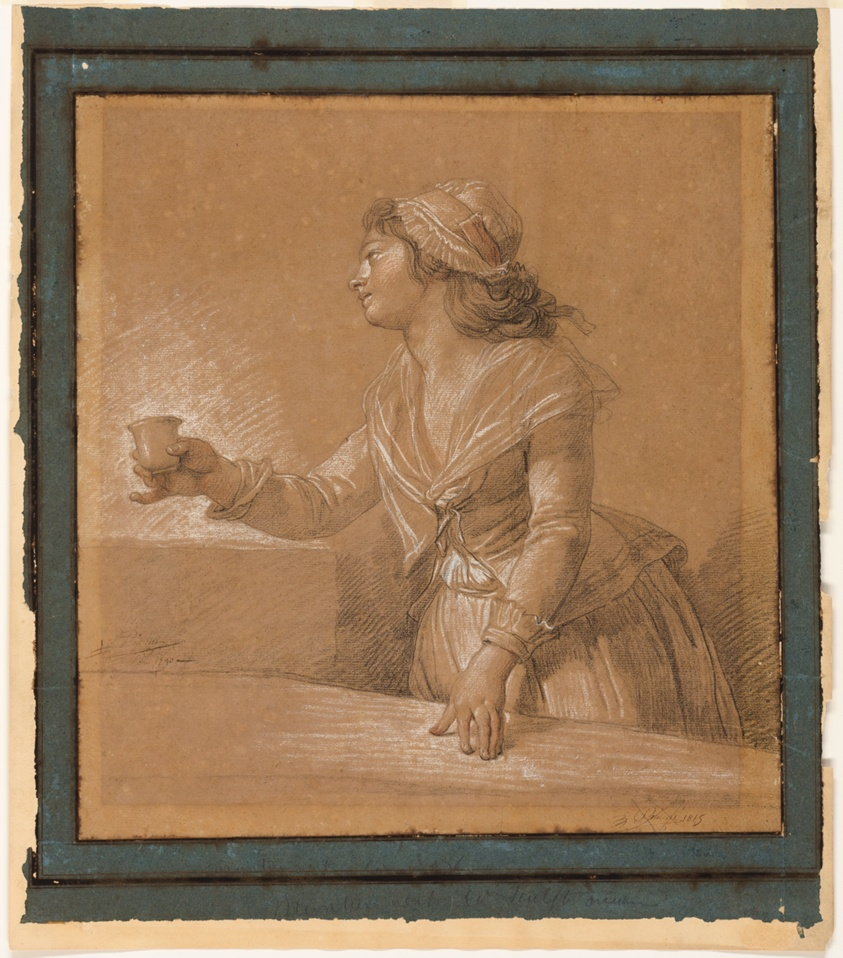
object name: Drawing and Watercolor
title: Young Woman at a Table Holding a Cup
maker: François André Vincent; French, 1746-1816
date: 1790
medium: Black and white chalks, with touches of red chalk, on tan laid paper, laid down on cream wove paper, with margins in blue laid paper and pen and iron gall ink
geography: France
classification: chalk; drawings (visual works); prints and drawing